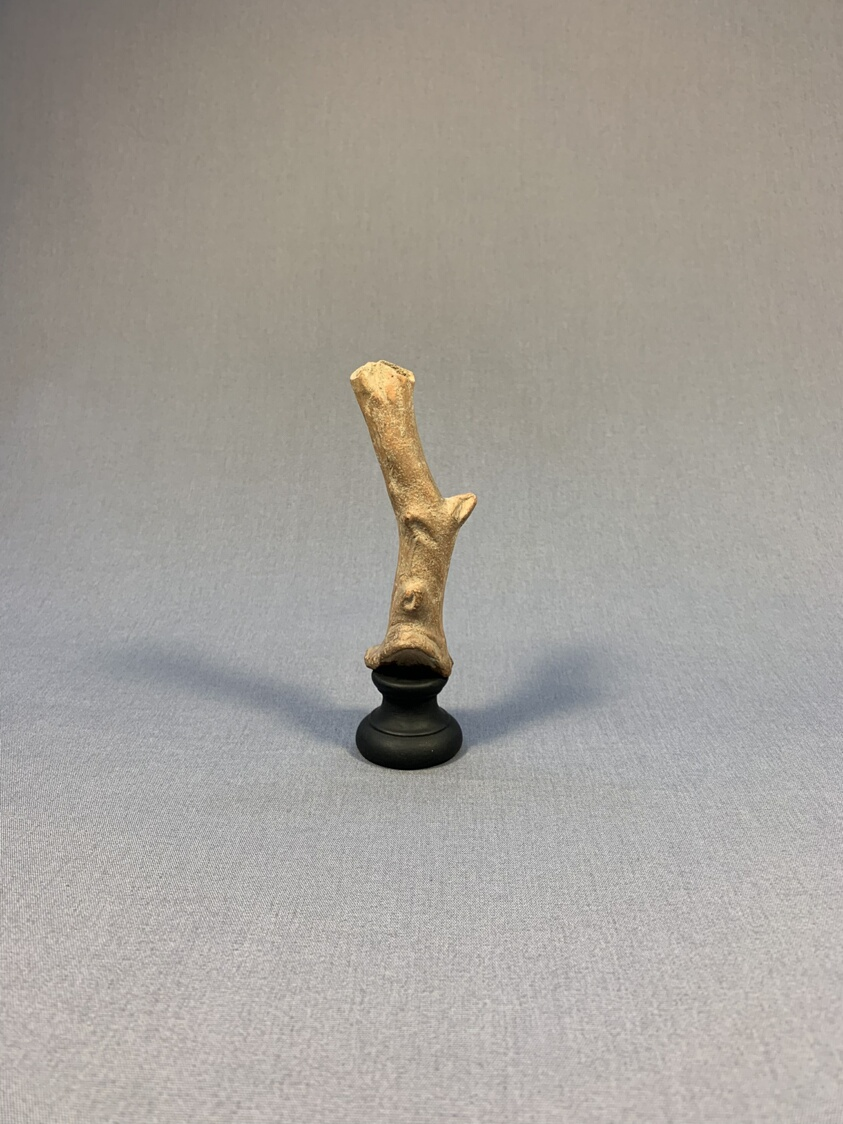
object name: Sculpture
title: Statuette of a Tree Trunk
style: greek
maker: Greek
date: 4th-3rd century BCE ?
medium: terracotta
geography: Greece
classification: earthenware; ceramics; sculpture; ancient art